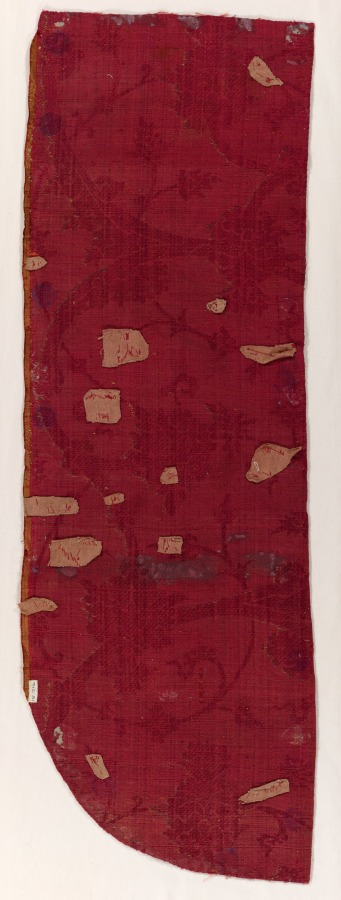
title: Velvet Fragment (of a Chasuble ?)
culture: Italy, 15th century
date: 1400s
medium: velvet (cut, voided, and brocaded): silk and gold thread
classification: Velvet